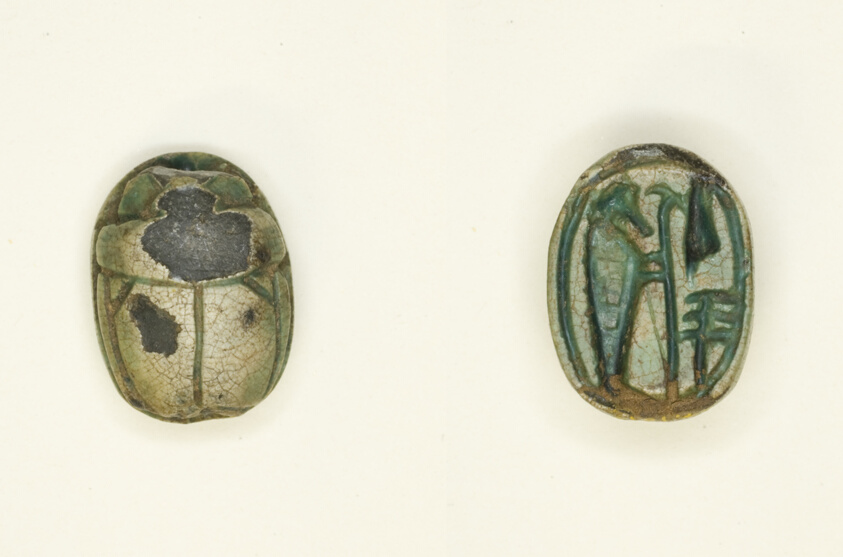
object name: Costume and Accessories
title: Scarab: The God Ptah with Ma’at Feather and Djed-Pillar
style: new kingdom, egyptian, ancient, nineteenth dynasty, ramesside period, twentieth dynasty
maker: Egyptian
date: New Kingdom, Ramesside Period, Dynasties 19–20 (about 1295-1069 BCE)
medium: Glazed steatite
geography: Egypt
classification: scarab; ceramics; ancient art; costume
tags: gods (deities), Hieroglyphs, insects